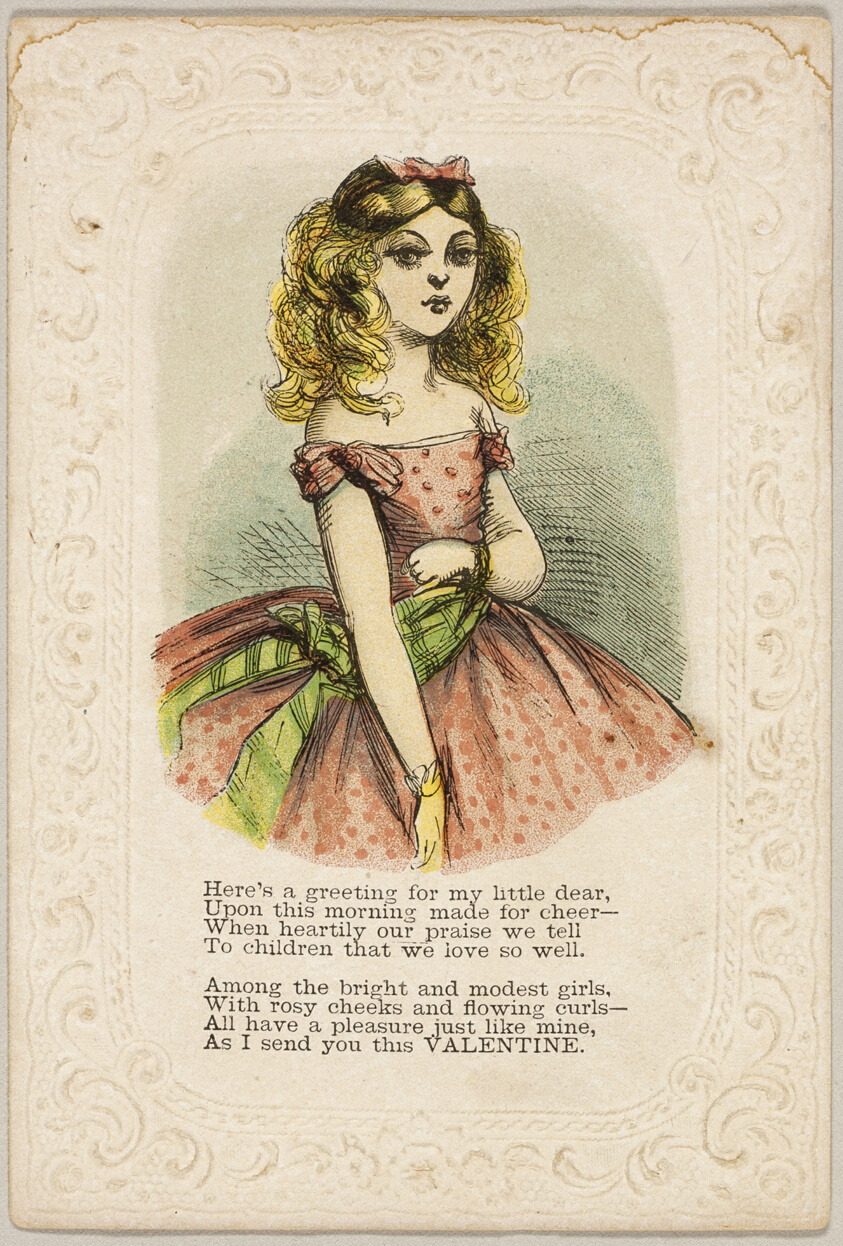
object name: Print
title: Here's a Greeting for My Little Dear (valentine)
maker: Unknown Artist; American, 19th century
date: 1860/69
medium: Lithograph with hand-coloring on embossed ivory wove paper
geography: United States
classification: valentine; prints and drawing; print